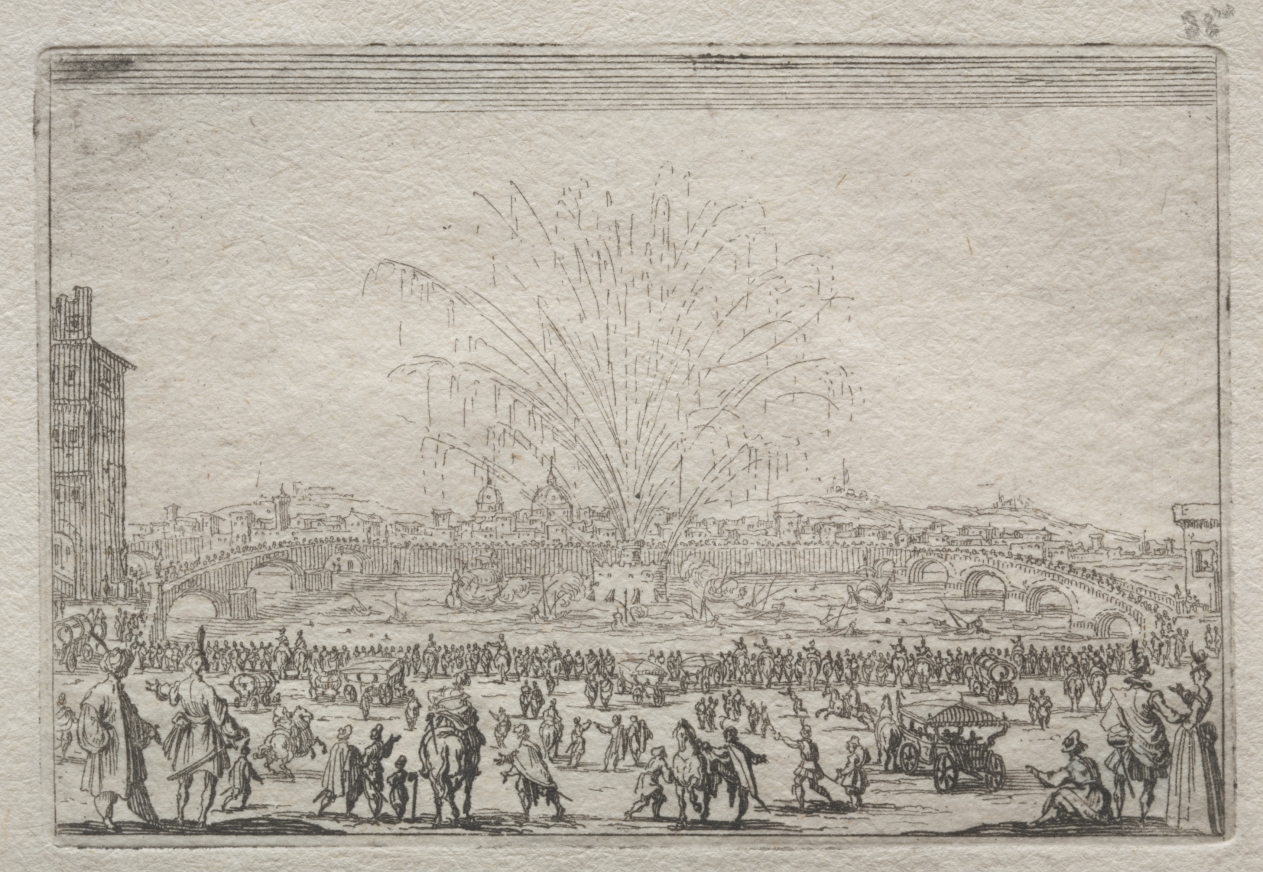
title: Fireworks on the Arno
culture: France, 17th century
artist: Jacques Callot (French, 1592–1635)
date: c. 1622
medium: etching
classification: Print